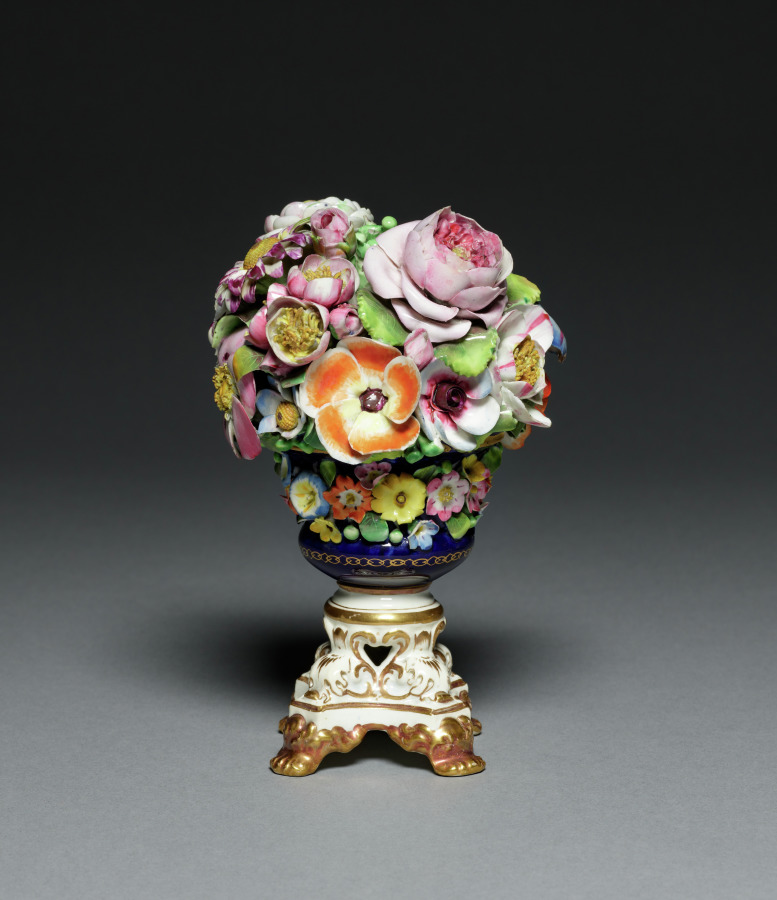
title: Flower Pot and Flowers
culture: England, Derby, 19th century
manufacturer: Derby Porcelain Factory (Bloor Period) (British)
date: 1811–1848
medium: artificial porcelain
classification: Ceramic